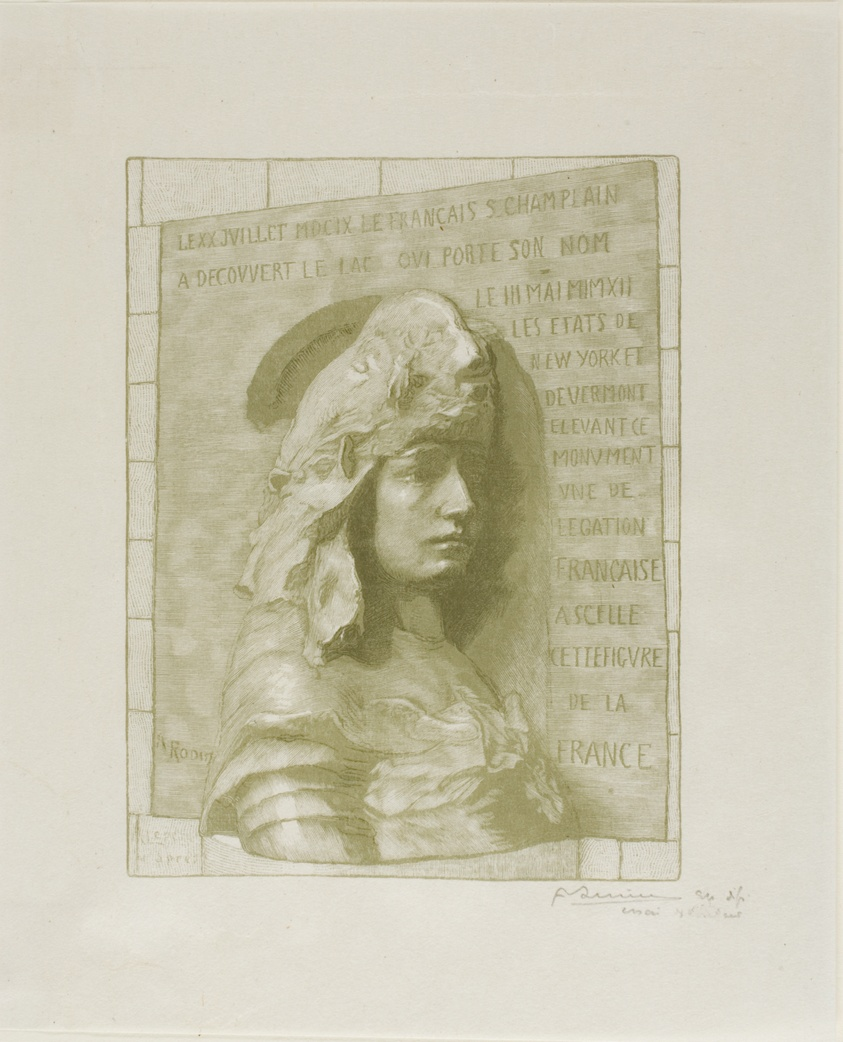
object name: Print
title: France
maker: Louis Auguste Lepère (French, 1849-1918); after Auguste Rodin (French, 1840-1917)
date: 1912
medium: Wood engraving in olive or green on ivory wove paper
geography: France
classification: wood engraving; print; prints and drawing